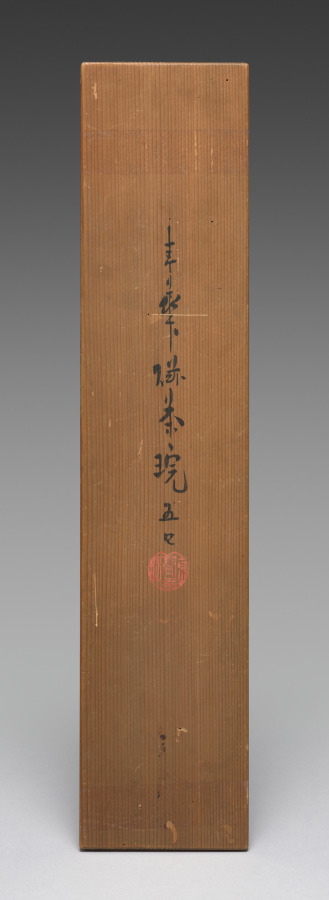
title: Tea Set with Orchids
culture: Japan, Meiji period (1868–1912)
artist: Seifū Yohei III (Japanese, 1851–1914)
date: c. 1893–1914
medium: Teapot with set of five teacups; porcelain with underglaze blue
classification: Ceramic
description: Although the teapot here is stored in a separate box from the five cups, these six pieces may once have been part of a tea set that included other tools such as a water cooler. The teacups have orchid flowers on both sides in underglaze blue, as well as a blue band inside the footring. The teapot has the same design and a blue band painted around the bottom of the lid’s knob. The cups’ long wood storage box is stamped on the exterior, over the lid and base, with a small red seal reading “Satō.” The same seal appears on five small squares of yellow textile, one placed in the bottom of each compartment in the teacup storage box. These are additional to the customary yellow cloths stamped with a “Seifu” seal. Interestingly, four of the Seifū cloths are stamped with an ovoid seal, while the remaining cloth, which is a slightly lighter color, has an unusual seal that is not quite gourd-shaped and with the fū of Seifū in a stylized, unrecognizable form. The teapot has its own box with a Satō seal and is wrapped with an orange textile stamped with the same unusual Seifū seal. A set with a very similar surface design is in the Brooklyn Museum. The Brooklyn set has a water cooler and a small pitcher, in addition to the teapot and cups, and all are in a single storage box. This box records the tea tools as made with kanpakuji, or “bright-jewel white porcelain,” counted among Yohei III’s most important inventions, and carved images. In fact, both sets have a white surface much closer in coloration to the cool white of porcelain clay used in Kyoto at the time, and the designs are simply painted. The Brooklyn set was thus likely mismatched at some point with a box intended for another tea set. Nonetheless, the box may have helped prevent the set’s original components from being dispersed, and the set itself provides insight into how the other tools from the present set may have looked.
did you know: This tea set with orchids has a side-handled pot called a kyūsu, used for steeping, straining, and serving tea.